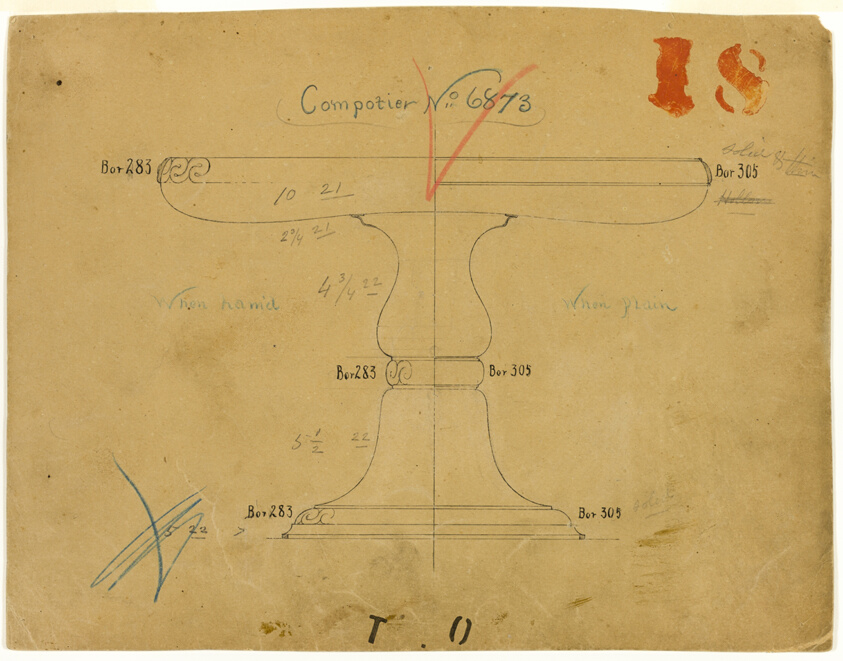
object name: Drawing and Watercolor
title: Design for Compotier No. 6873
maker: Tiffany and Company (American, founded 1837)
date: 1882/83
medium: Black ink and pencil on tan wove paper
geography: United States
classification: prints and drawing; paper